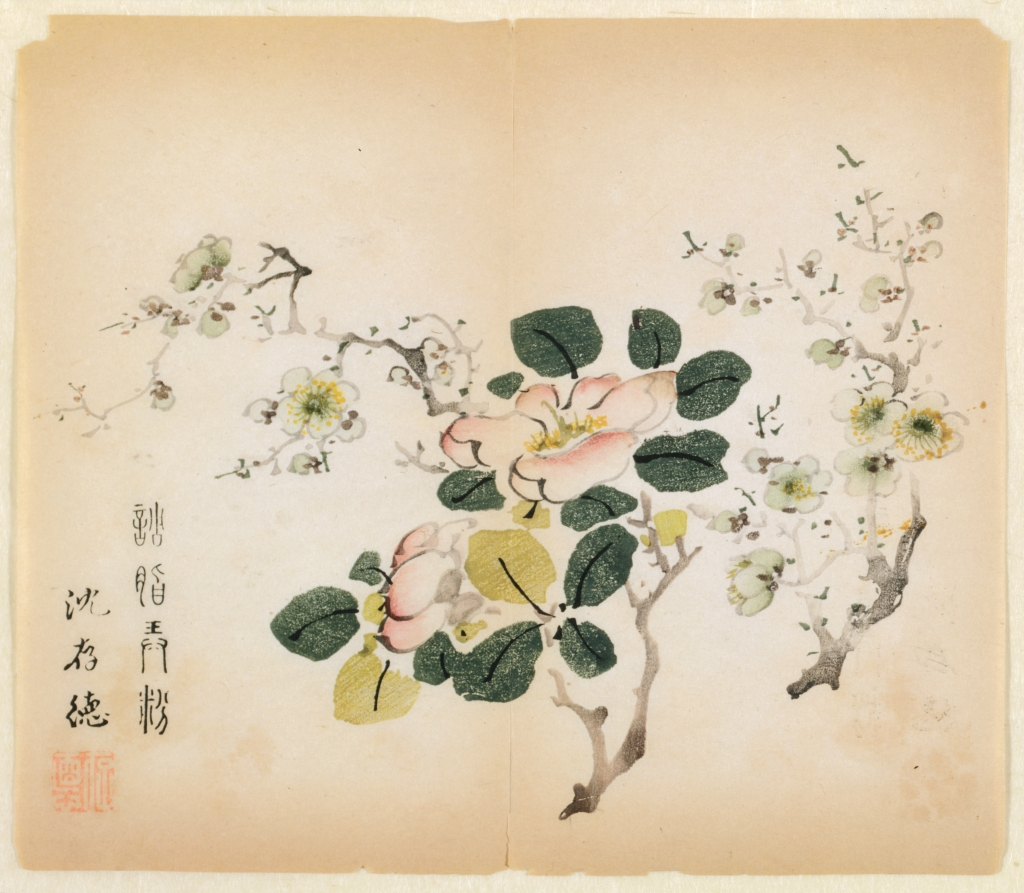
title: Flowering Prunus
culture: China, Ming dynasty (1368-1644) or later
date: 1368–1644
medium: color woodblock print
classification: Print